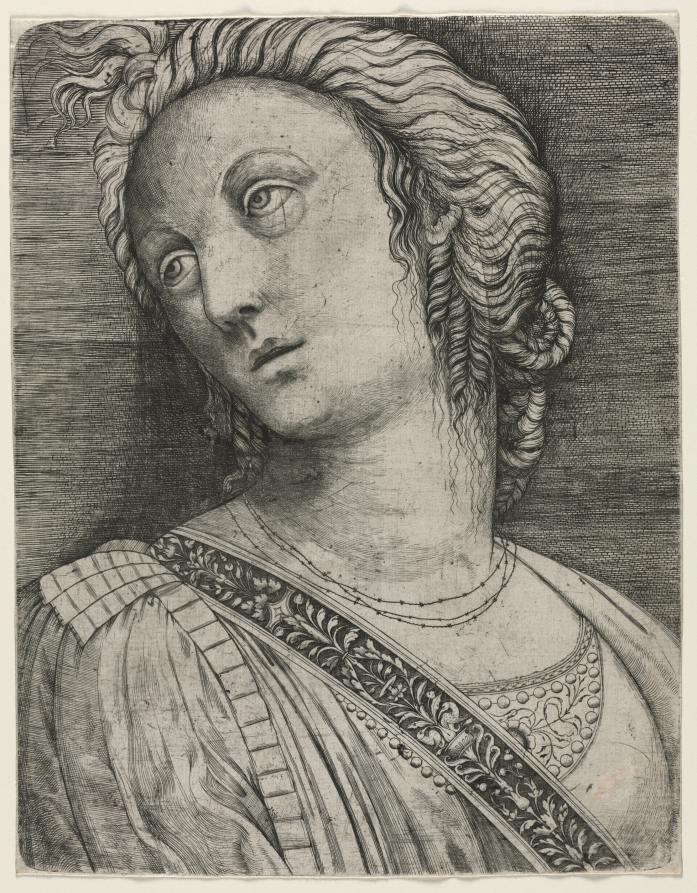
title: Bust of a Woman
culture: Italy, 16th century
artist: attributed to Jacopo de' Barbari (Italian, c. 1460/70–c. 1516)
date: c. 1506–12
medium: engraving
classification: Print